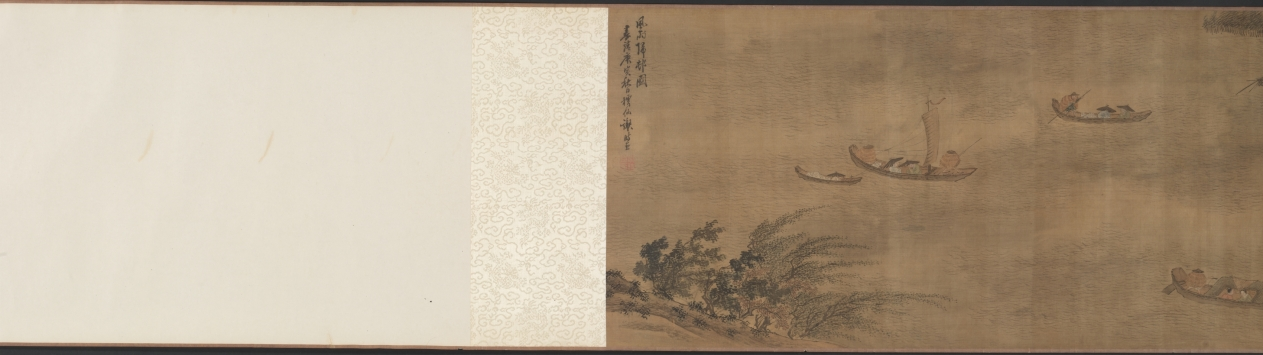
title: Returning to the Village in a Rainstorm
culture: China, Ming dynasty (1368–1644)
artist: Xie Shichen (Chinese, 1487–after 1567)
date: 1530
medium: Handscroll; ink and light color on silk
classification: Painting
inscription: 風雨歸村圖 嘉靖庚寅秋日樗仙謝時臣. [印] 謝時臣印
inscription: 3 additional seals unidentified.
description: This scroll depicts a wind- and rainswept landscape with figures in the countryside struggling against a late summer monsoon rainstorm. Such weather was familiar to residents of the lower Yangzi delta. Xie Shichen spent most of his life in the Suzhou area. Details of his career are scant, but his surviving works suggest that he made his living as a professional painter. This painting conveys drama and anecdotal observations, characteristic of Zhe school paintings, such as the one by Lü Wenying, CMA 1970.76.